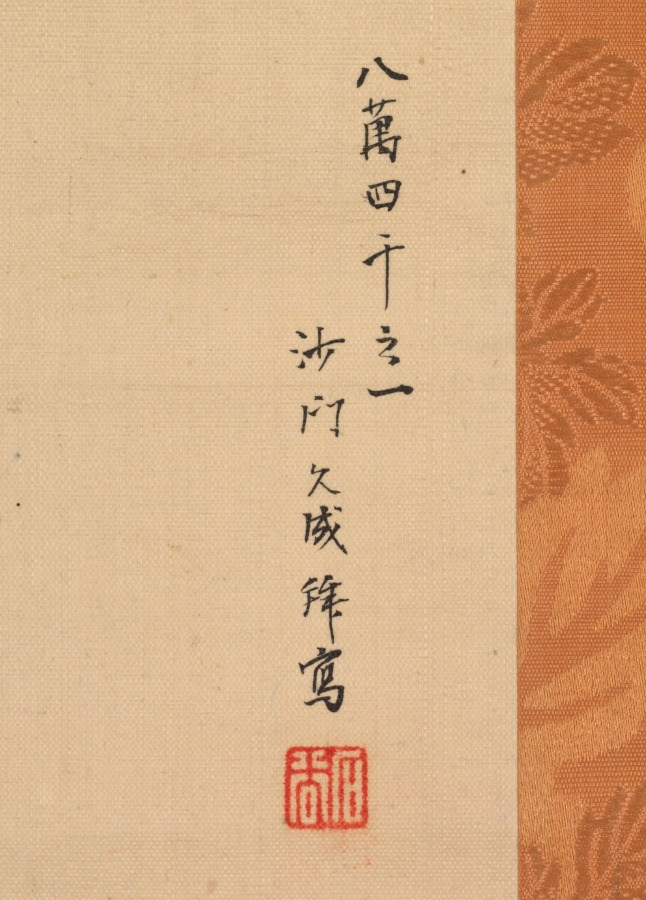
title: White-Robed Guanyin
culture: China, Yuan dynasty (1271-1368)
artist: copy after Jueji Yongzhong (Chinese, active around 1300)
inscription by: Zhongfeng Mingben (Chinese, 1263–1323)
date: late 1200s–early 1300s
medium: hanging scroll; ink and gold on silk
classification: Painting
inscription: Inscription: one of the 84,000 painted by the priest Insei.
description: The original model for this ink drawing of Guanyin, the bodhisattva of infinite compassion (Avalokiteshvara in Sanskrit), is CMA 1978.47.1. This drawing is a later copy with the same image of the White-Robed Guanyin, but in reverse. The inscription above reads: one of the 84,000 painted by the priest Insei. The inscription seems to indicate that the Japanese priest Insei repeatedly copied the image of the bodhisattva in an act of piety and to accumulate merit, as is promised in the Lotus Sutra for anyone who paints images of the Buddha, they “will achieve the Buddha path.” The priest’s name and seal need further study and identification.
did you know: The bodhisattva's face and halo were delicately painted in gold.